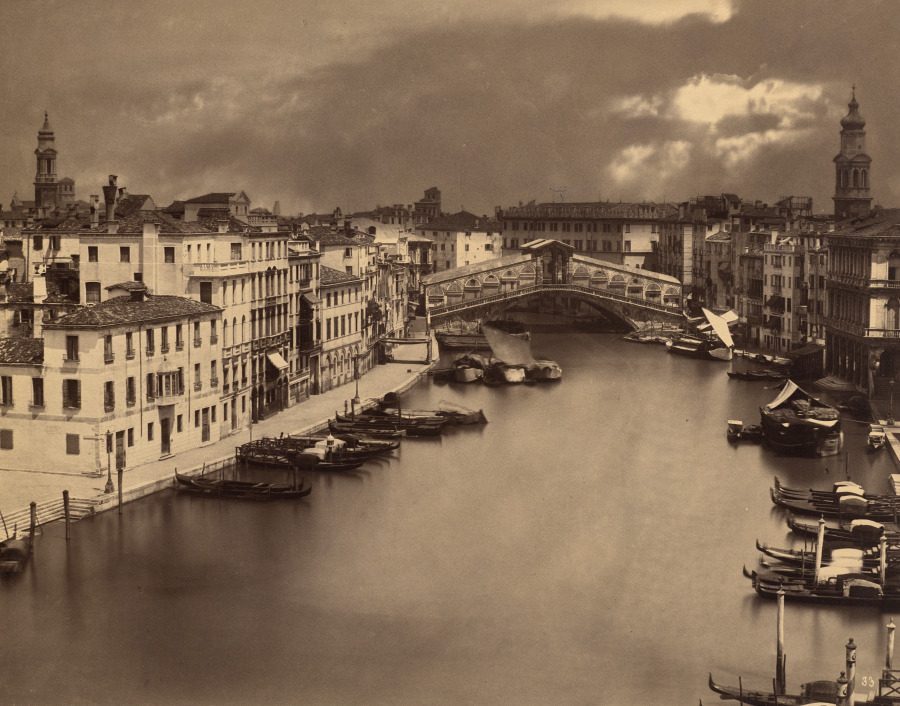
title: Venice in Moonlight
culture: Italy, 19th century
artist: Carlo Naya (Italian, 1816–1882)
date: 1870s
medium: albumen print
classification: Photograph